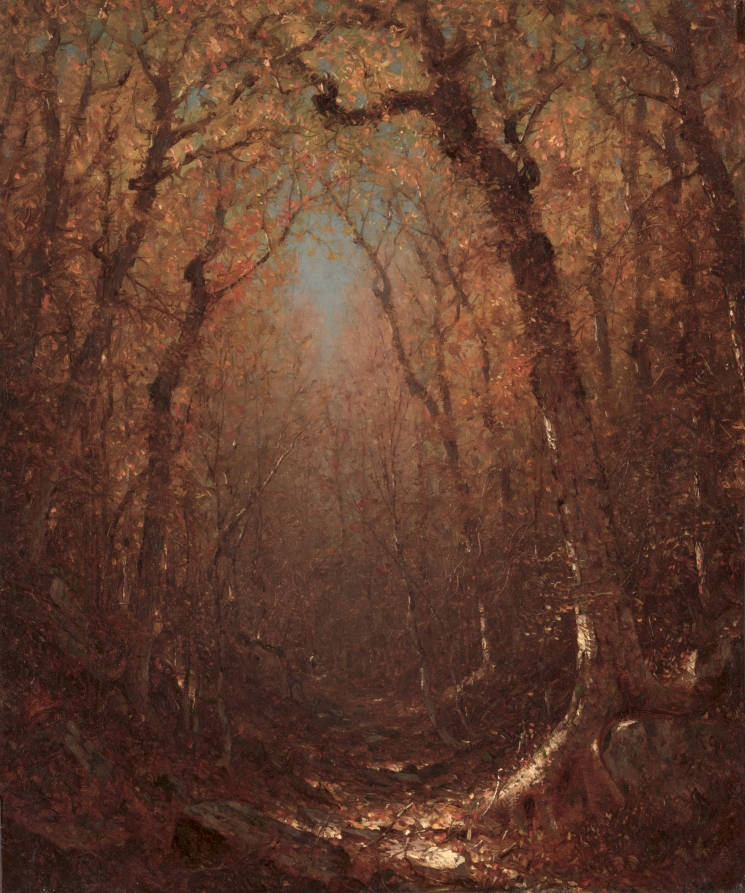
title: Autumn, a Wood Path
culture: America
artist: Sanford Robinson Gifford (American, 1823–1880)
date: 1876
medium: oil on canvas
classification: Painting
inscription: signed lower right: S R Gifford / 1876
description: Gifford created several paintings depicting forest interiors, including this intimately scaled canvas set amid full autumnal blaze. The dense network of overarching trees casts shadows on the rugged ground below, restricting sunlight to haphazard patches. A solitary hiker is visible in the distance.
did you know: The artist's namesake, Gifford Pinchot, was the first chief of the United States Forest Service.